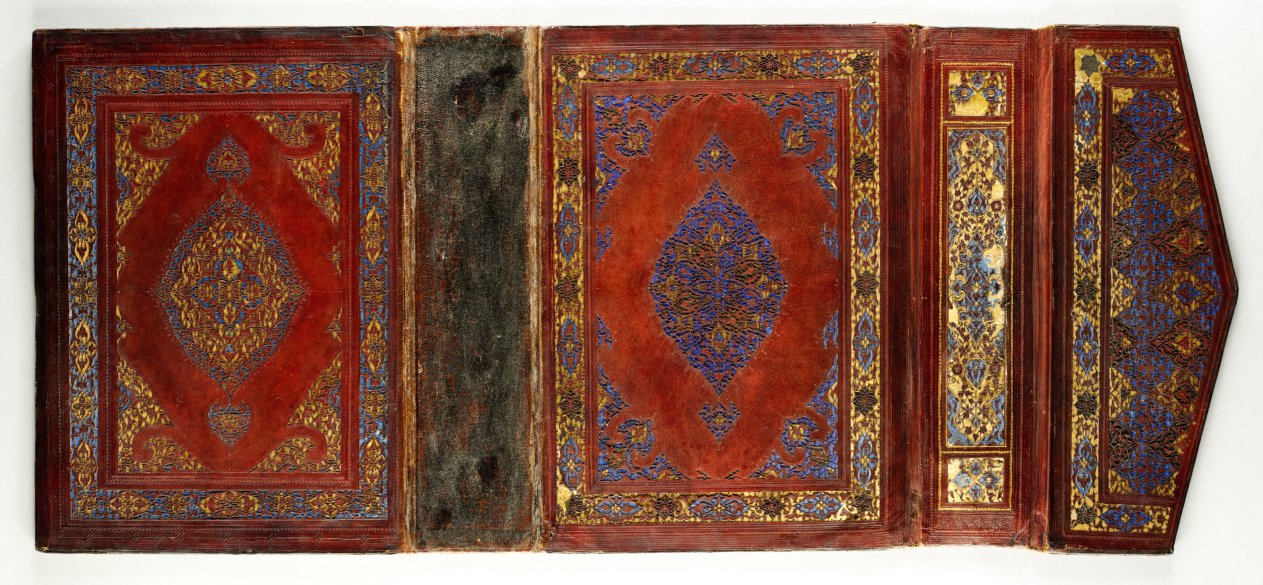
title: Bookbinding for a Qur'an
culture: Turkey, Istanbul, Ottoman period, 15th century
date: 1460–1500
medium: leather over paper pasteboards; outer cover tooled, blue paint; inner covers openwork designs over colored papers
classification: Book Binding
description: Islamic book covers generally have a triangular flap attached to the rear cover of the binding which is tucked under the front cover to protect the outside edge of the pages. The outer covers of this particularly elaborate example feature panels with Qur'anic inscriptions, interlace patterns, and a central medallion filled with floral and arabesque designs. The inner covers offer a superb example of leather openwork, a leather technique that originated in northeastern Iran in the 1400s.